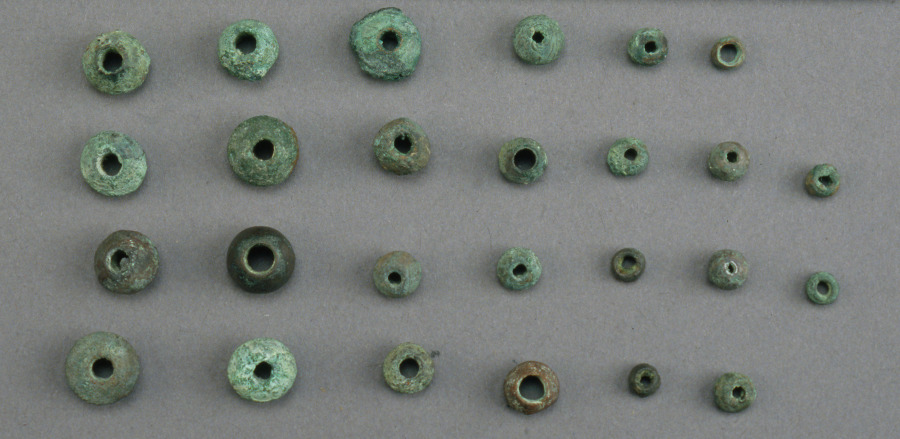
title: Medallion, beads, and spindle whorls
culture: Central Andes, North Coast, Chimú (medallion)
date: 1000–1532 (medallion)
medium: bronze, copper, silver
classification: Jewelry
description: This medallion and dozens of smaller beads and spindle whorls arrived at the museum strung on modern cord. Pierced with a hole at the top, it could have been suspended from a necklace or attached to a backing, such as a textile. It comes from Peru’s north coast and was made in the late pre-Hispanic period; the dates of the smaller beads are less clear.